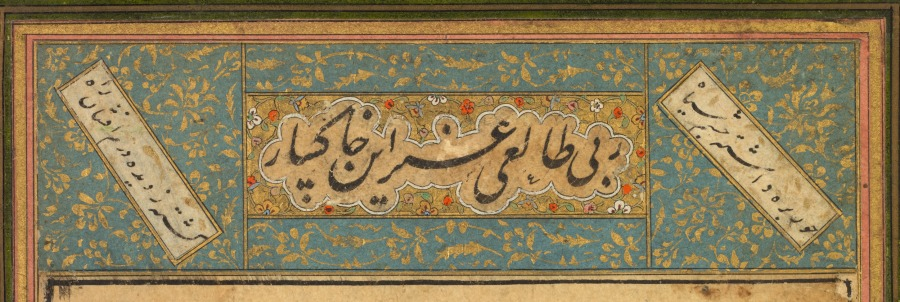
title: A prince riding a composite elephant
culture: India, Golconda, Deccan, 16th century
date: c. 1590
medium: Gum tempera, ink, and gold on paper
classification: Painting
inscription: Inscriptions: Calligraphy of Persian verses in top and bottom borders, in nasta‘liq script: Central verse (half-line on top, the other below the elephant’s feet): Given the foretold lackluster fortune of this abject servant Nothing is writ save words of your bounty Diagonal verses on top: The angelic beauties of paradise with their anxious dark-eyes set on the road Their glances throwing gold coins on the path (as a welcome) Diagonal verses below: The glittering full face of the sun is no more than a single drop From the perspiration behind his ear.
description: A prince sits cross-legged in a covered howdah seat secured to the back of a royal elephant with golden rings on its tusks. The elephant is being driven by attendants, one of whom holds a goad. Artists in the southern Indian region known as the Deccan expanded upon Persian practices of embedding creatures in landscape scenes—like a visual double-entendre—and created inventive images of composite creatures made up of figures that invite extended close looking. This painting would have been mounted in an album that was brought out for entertainment in elite intimate gatherings.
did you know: Two lions share one head at the top of the elephant’s head.